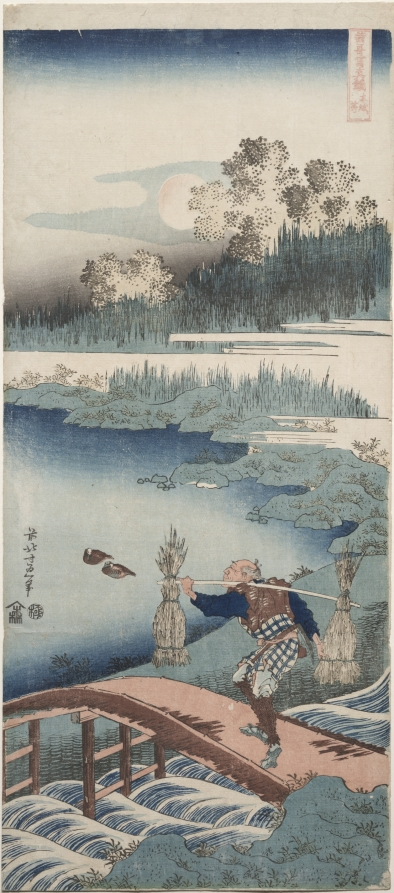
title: The Rush Gatherer, from the series A True Mirror of Chinese and Japanese Poetry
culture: Japan, Edo period (1615–1868)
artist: Katsushika Hokusai (Japanese, 1760–1849)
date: 1834–35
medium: color woodblock print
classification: Print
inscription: Signature: Zen Hokusai Iitsu hitsu Publisher: Moriya Jisuke (emblem) Censorship Seal: kiwame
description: The subject of this design may be related to a 1309 poem that contains the following lines: When I was cutting horse-tails The autumn moon appeared, Shining through the trees on Mount Sonahara.